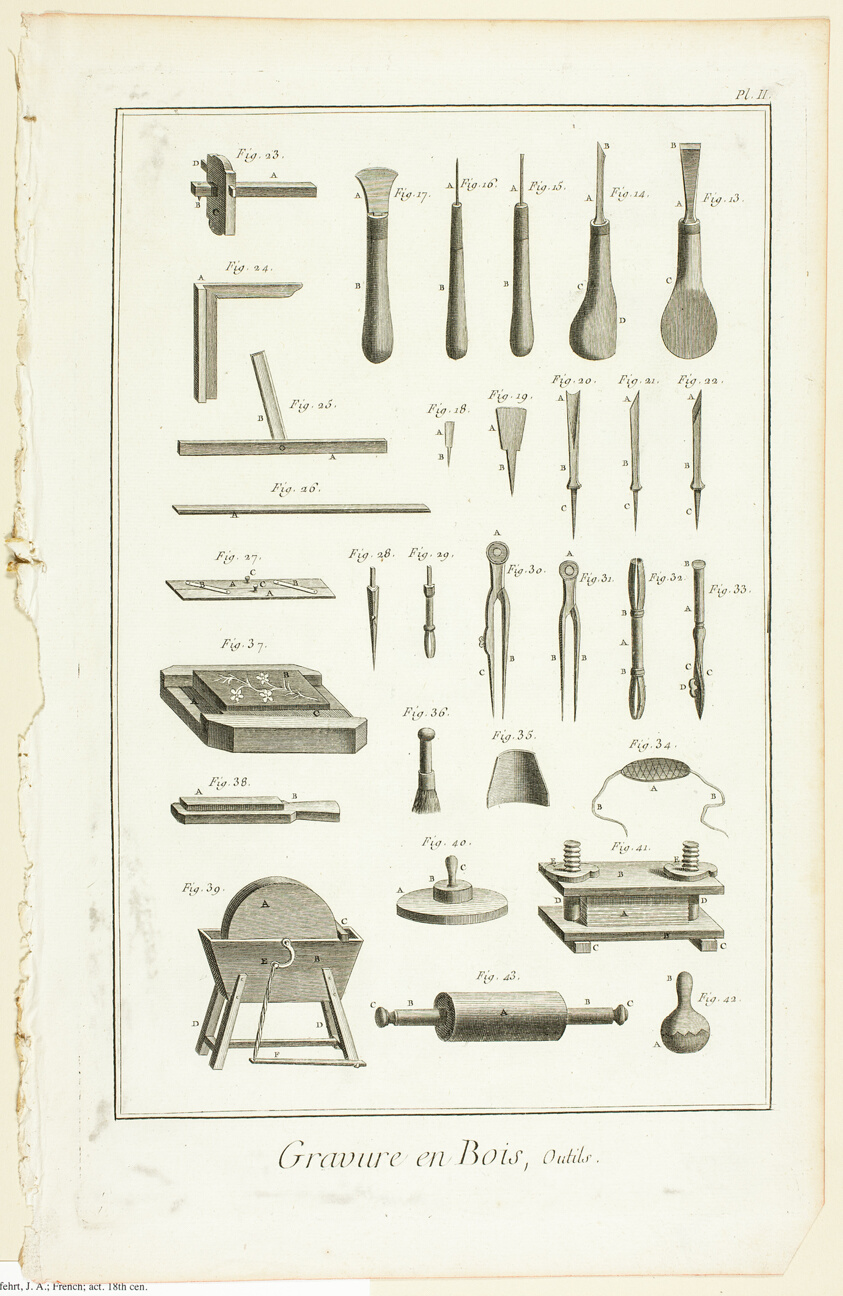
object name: Print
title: Wood Engraving, Tools, from Encyclopédie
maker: A. J. Defehrt (French, active 18th century); published by André le Breton (French, 1708-1779), Michel-Antoine David (French, c. 1707-1769), Laurent Durand (French, 1712-1763), and Antoine-Claude Briasson (French, 1700-1775)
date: 1762/77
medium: Engraving on cream laid paper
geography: France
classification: etching; print; prints and drawing